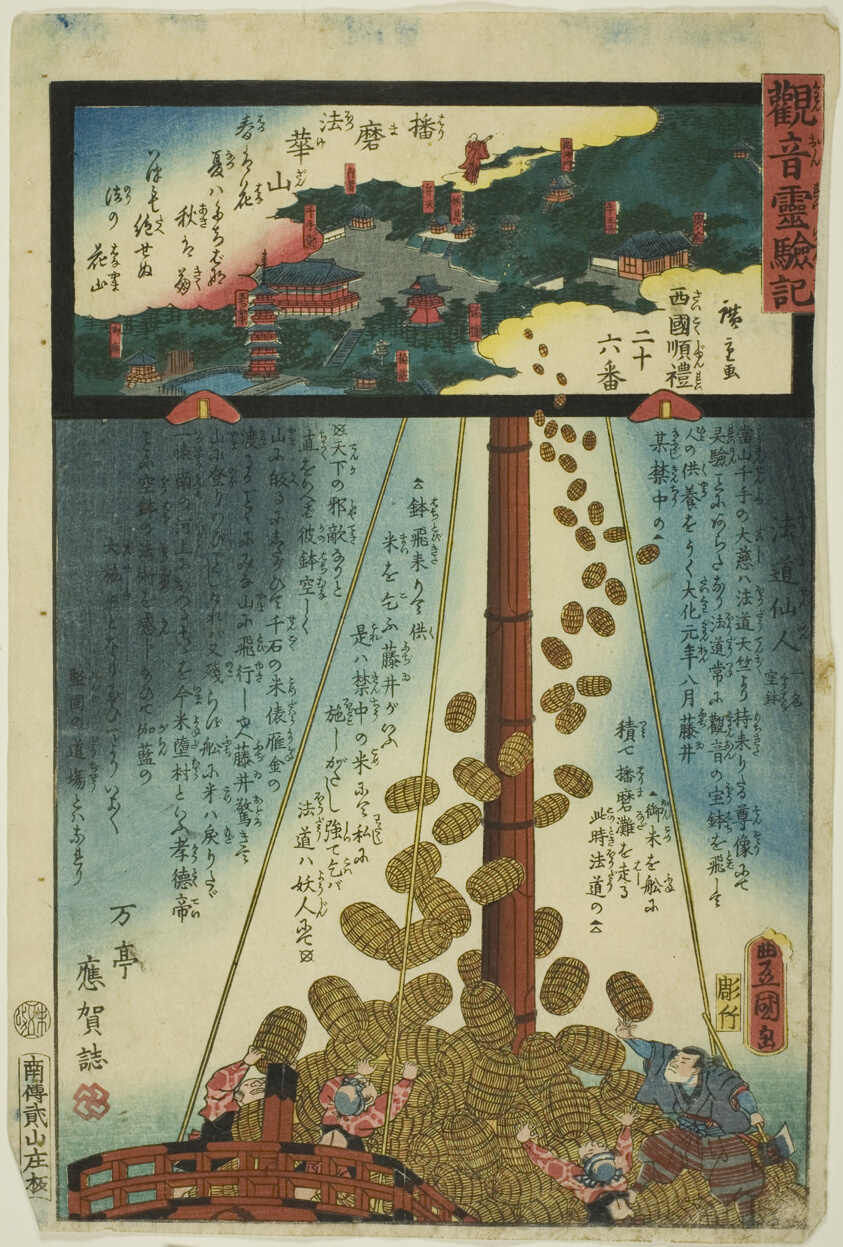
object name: Print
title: Mount Hokke in Harima Province, No. 26 on the Saikoku Pilgrimage Route (Saikoku junrei nijurokuban Harima Hokkezan), from the series "The Miracles of Kannon (Kannon reigenki)"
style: Japanese (culture or style)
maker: Utagawa Kunisada I (Toyokuni III); Japanese, 1786-1864; Utagawa Hiroshige II (Shigenobu); Japanese, 1826–1869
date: 1859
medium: Color woodblock print; oban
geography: Japan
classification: woodblock print; print; asian art